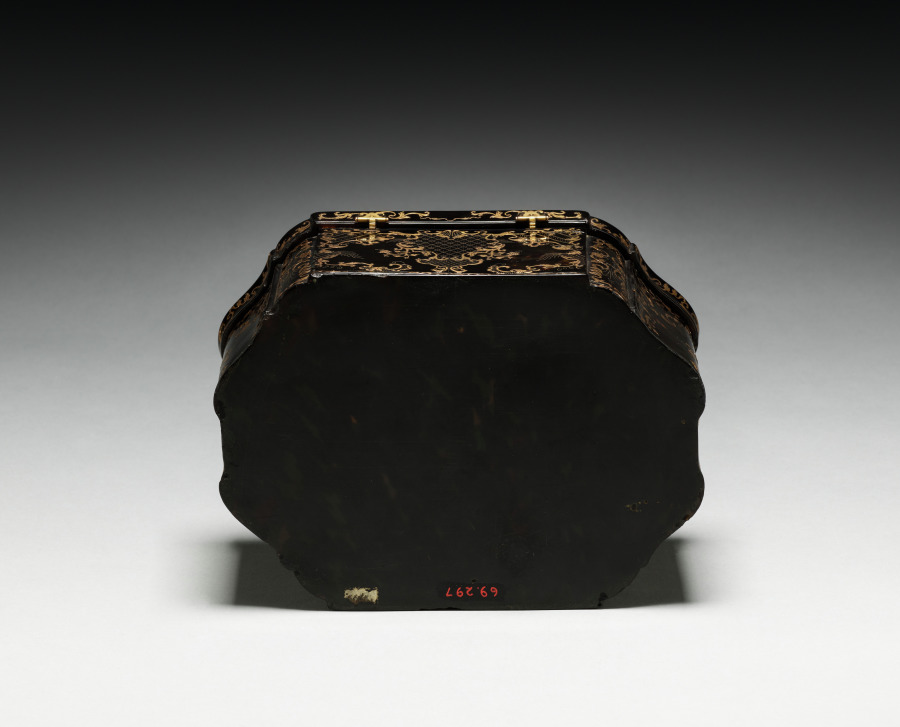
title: Box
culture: Italy, Naples (?), 18th century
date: c. 1750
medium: tortoise shell and gold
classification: Miscellaneous